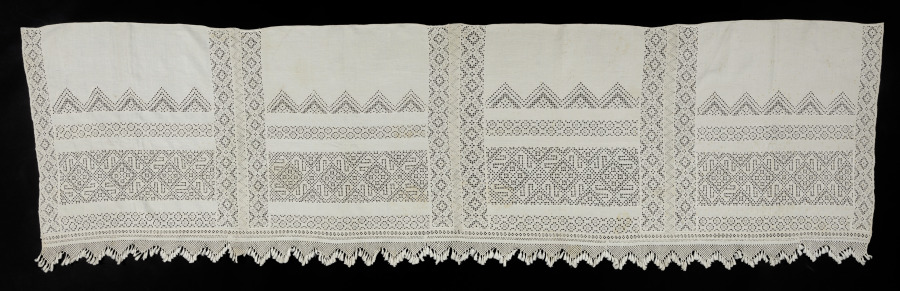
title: Lace Sheet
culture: Italy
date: 1600s–1700s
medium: Linen: needle lace (drawnwork) and knotted lace and fringe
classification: Lace